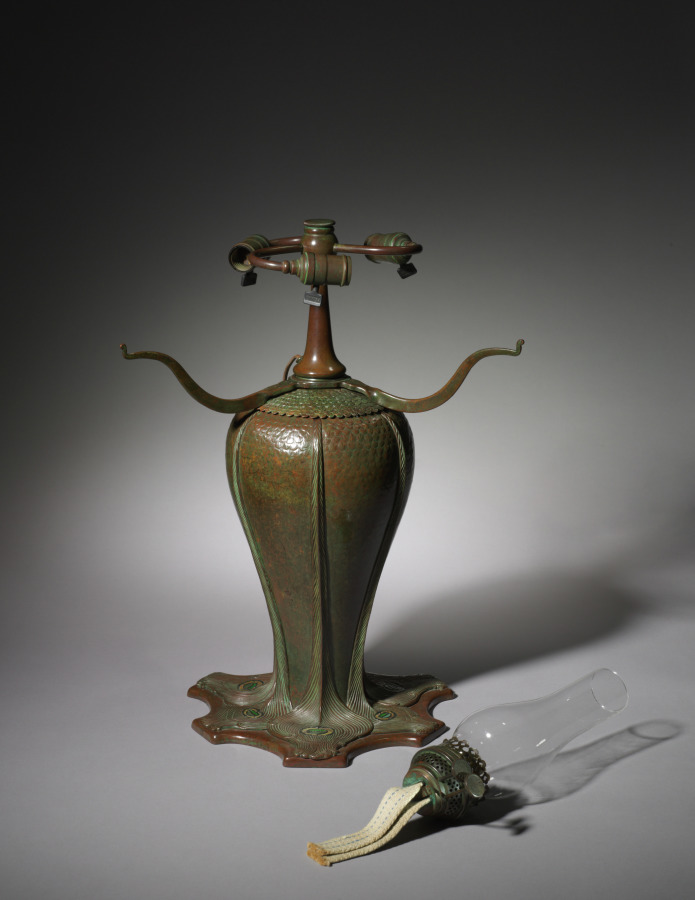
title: Peacock Table Lamp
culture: America, New York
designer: probably by Clara Wolcott Driscoll (American, 1861–1944)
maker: Tiffany Studios (United States, New York, 1902–32)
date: c. 1902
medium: Leaded glass, bronze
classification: Lamp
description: The peacock, with its brilliantly colored iridescent plumage, was a favorite motif of Louis Comfort Tiffany, appearing in almost every genre of his artistic production. The Peacock table lamp, created by Tiffany's chief lamp designer Clara Wolcott Driscoll, evokes the wide circular swath of a peacock's preening feathers and attracted critical acclaim to both Driscoll and Tiffany Studios. This particular version retains its original kerosene burning fluid apparatus as well as an electric bulb armature. Although incandescent lamp bulbs had become more widely available in the 1890s, most households, even those of the wealthy, were not yet wired for electricity. Tiffany originally designed his lamps with an oil-burning apparatus, consisting of a reservoir and a double wick and chimney, as well as an electric attachment. He cleverly predicted, though, that electric households would eventually become commonplace, so he soon moved to all-electric designs, greatly increasing the illumination and appeal of his lamps.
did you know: Originally designed to burn kerosene, this Peacock lamp still retains its original double wick and oil reservoir along with an adapter for electric light bulbs.